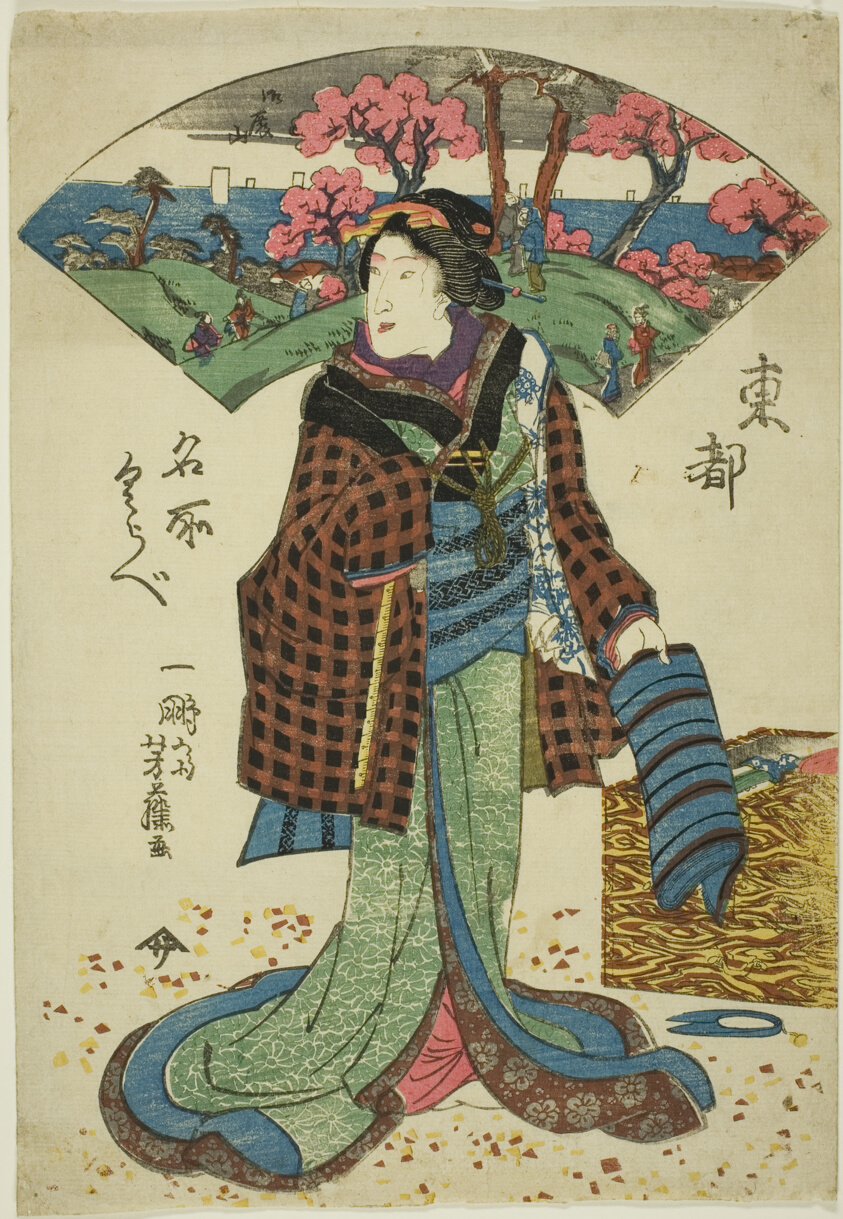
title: Two states of same print showing a woman apparently a seamstress who stands isolated on the page with a landscape fan behind her across top of print. From the Series: Tôto Meisho Kurabe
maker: Utagawa Yoshifuji; Japanese, 1828-1887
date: 1841–1899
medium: Color woodblock print; nishiki-e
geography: Japan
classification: print; asian art